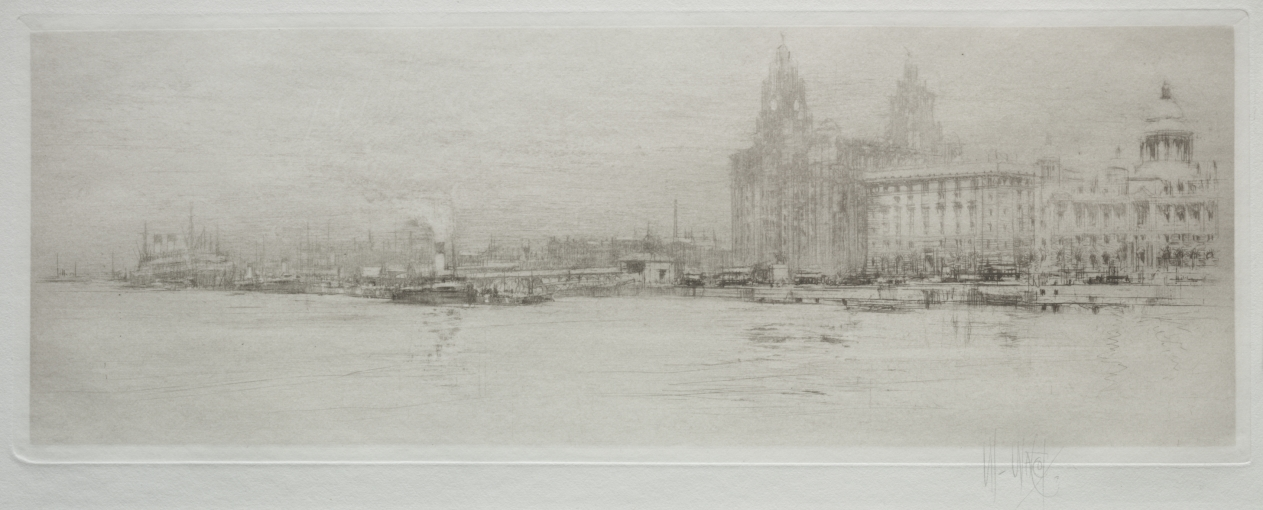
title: Arteries of Great Britain: The Mersey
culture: England, 20th century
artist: William Walcot (British, 1874–1943)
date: 1922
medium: drypoint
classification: Print